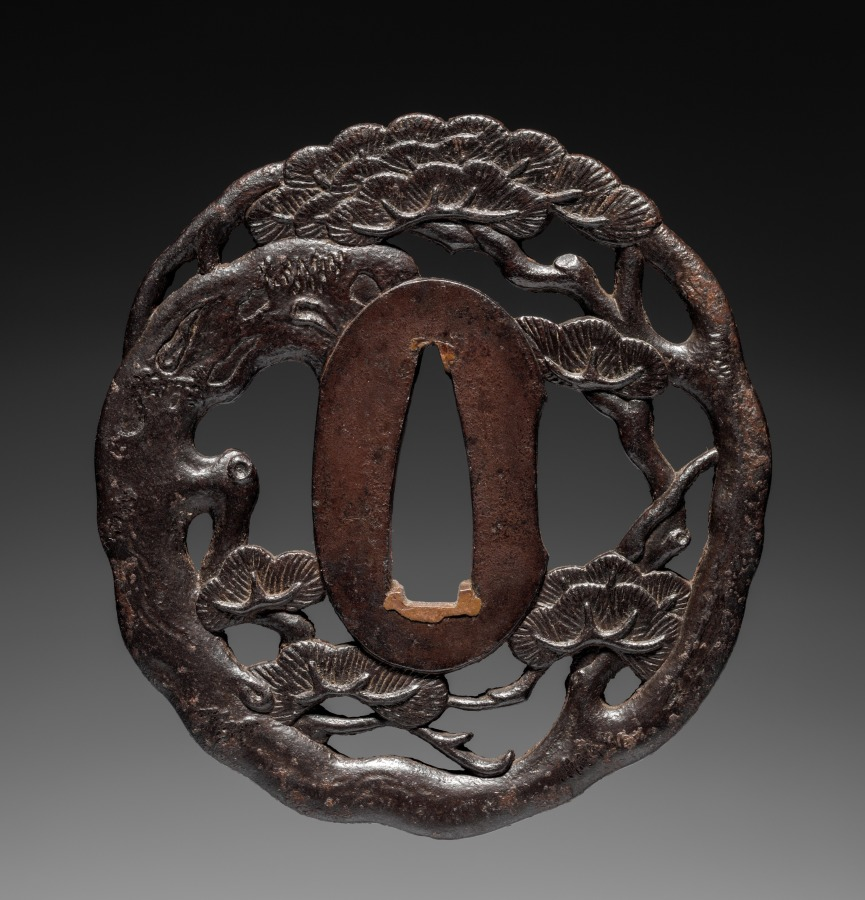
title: Sword Guard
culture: Japan, Edo period (1615–1868)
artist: Masashige (Japanese)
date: late 1700s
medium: iron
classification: Arms and Armor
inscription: Signature: Masashige, residing in Musashi province